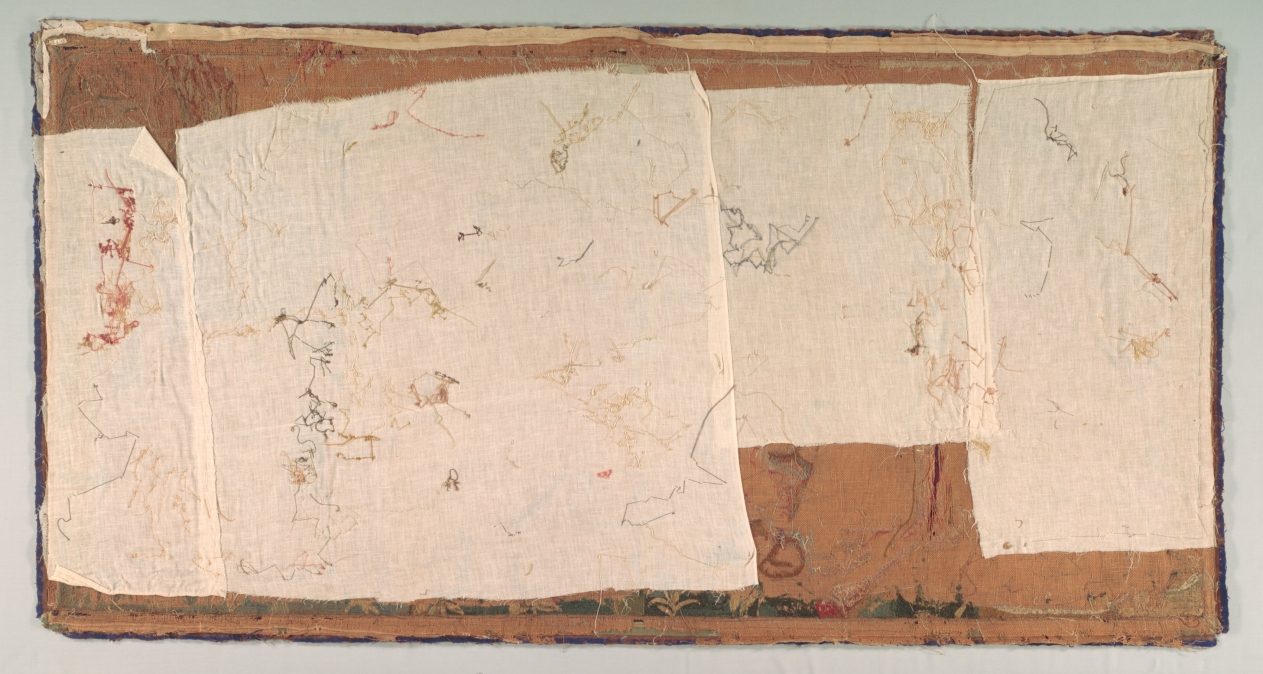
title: Altar Frontal with the Lamentation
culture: Italy, Ferrara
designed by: attributed to Cosimo Tura (Italian, c. 1430–1495)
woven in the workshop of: Rubinetto de Francia (Italian, active 1457–1483)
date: c. 1474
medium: Wool, silk, gold and silver threads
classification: Tapestry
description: A decorative textile suspended along the altar’s entire front, an altar frontal was often embellished with gold and silver threads, as seen here. This rare example depicts the lamentation of Christ, a common subject in Christian art in which the body of Christ is mourned after its removal from the cross. This version is highly acclaimed for its emotional intensity. Christ’s body is arranged in the shape of the cross, his shoulder rests on the Virgin’s knees, Saint John the Evangelist cradles his left arm, and Mary Magdalene supports his feet. Joseph of Arimathea carries the three nails with which Christ was crucified. This altar cloth was designed by Cosimo Tura who was employed at the court of Ercole I d’Este, duke of Ferrara, as a painter, illuminator, and tapestry designer between 1475 and 1484. His design was woven by Rubinetto di Francia, who was head of a large tapestry workshop at Ercole’s court. The subject of the design would imply its use during the Easter season.